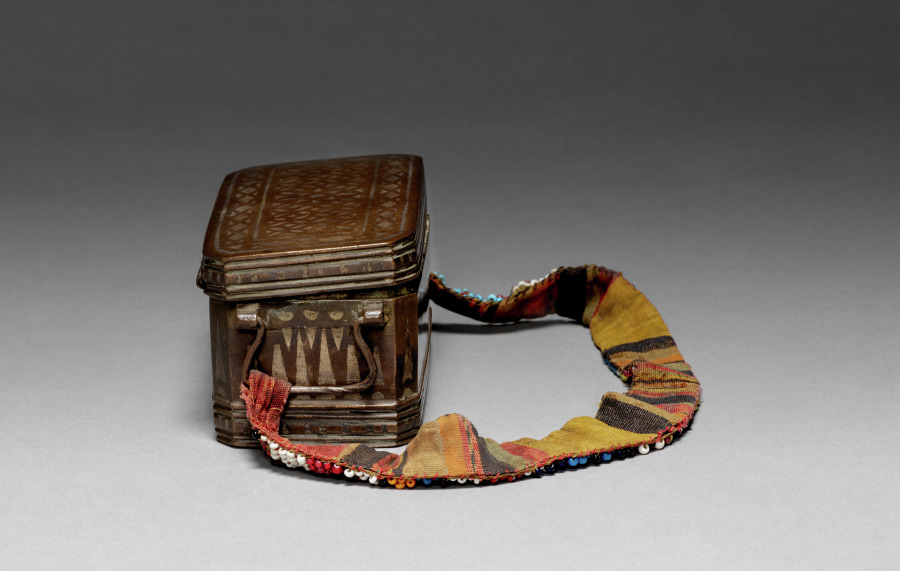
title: Betel nut container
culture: Philippines, Mindanao, most likely Maranao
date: 1800s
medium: Cast brass with silver inlays, weave fabric (handle), glass beads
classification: Arms and Armor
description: Chewing betel has been a social ritual common throughout Southeast Asia and Oceania for centuries. This betel nut container held the ingredients (areca nut, slaked lime, and betel leaves) used for this practice. The rectangular box, made of cast brass, is richly decorated with inlaid silver geometric motifs. It features a multicolored beaded strap with a pattern typical of the Bagobo people.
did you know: The beaded strap suggests portability; it may have been worn or suspended during social gatherings.